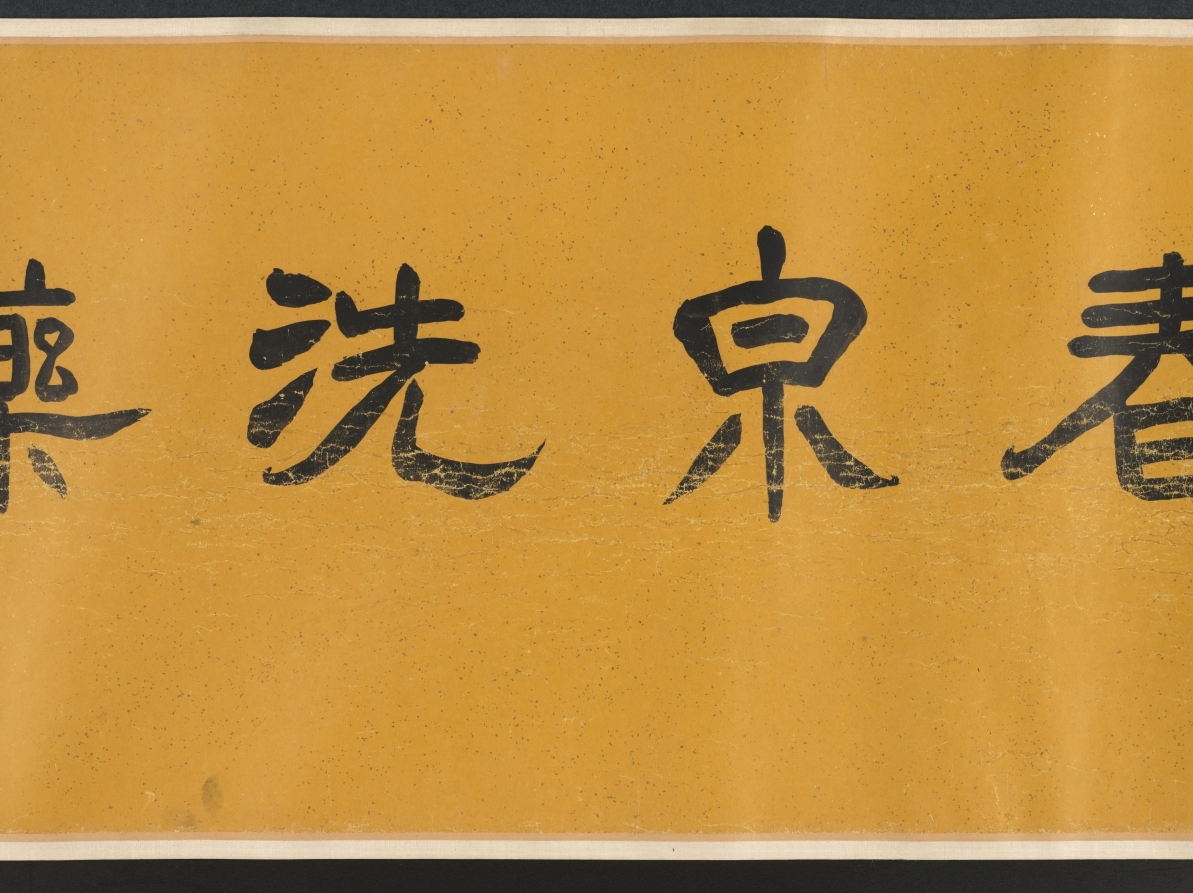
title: Cleansing Medicinal Herbs in the Stream on a Spring Day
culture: China, Qing dynasty (1644-1911)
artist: Yu Zhiding (Chinese, 1647–c. 1716)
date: 1703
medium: Handscroll; ink and color on silk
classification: Painting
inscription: Title by Chen Yixi.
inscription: 姑射仙人冰雪膚，新詩傳唱滿通都。/ 極知遲暮難為別，更展春泉洗藥圖。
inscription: Colophon by Chen Tingjing 陳廷敬 (1639–1712). Colophon by Wang Hongxu 王鴻緒 (1645–1723), dated 1707. Colophon by Song Luo 宋犖 (1634–1714). Colophon by Liu Yan 劉巗. Colophon by Jing Xikui 涇西夔. Colophon by Liu Yan 劉巗. Colophon by Cao Yin 曹寅. Colophon by Wang Shihong 汪士鋐. Colophon by Wang Shidan 王式丹 (1645–1718), dated 1712. Colophon by Shi Shenyi 史申義 (1661–1712), dated 1712. Colophon by Yin Yuqing 殷餘慶, dated 1712.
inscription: Colophon by Chen Shixia 陳時夏, dated 1729.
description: A famous portraitist, Yu Zhiding here depicts the likeness of Shi Shenyi 史申義 (1661–1712), an official and poet. Master Shi, a sickly man, was deeply interested in medicinal science. The opening section of the scroll features a boy washing a fungus in fresh spring water, a basket of medicinal herbs by his side. Other servants carry a fan, a bundle of scrolls, and a cup of tea or hot wine. Master Shi sits in a bamboo grove, surrounded by fields of herbs. Returning swallows, pink peach blossoms, and blooming magnolia indicate spring, whereas the fungus conveys wishes for long life. The spring theme may express the artist’s wish for his friend’s recovery.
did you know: In the pavilion are some of Shi Shenyi’s scholarly accoutrements: a stack of books, an antique zun 尊 (wine vessel), a brush holder, an ink stone, and a small chime.